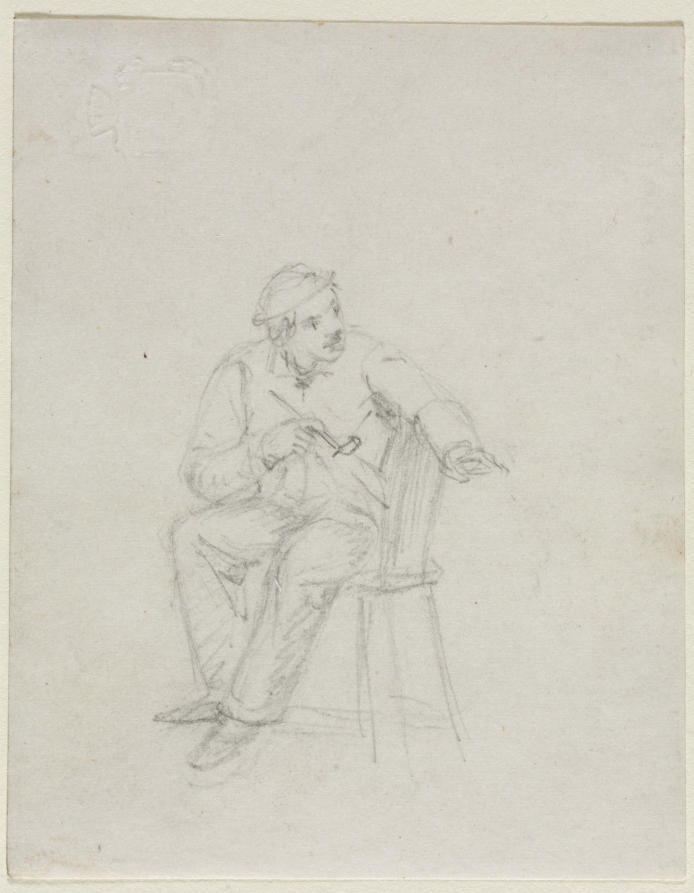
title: Man Smoking a Pipe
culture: America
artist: William Sidney Mount (American, 1807–1868)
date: c. 1827–68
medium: graphite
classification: Drawing